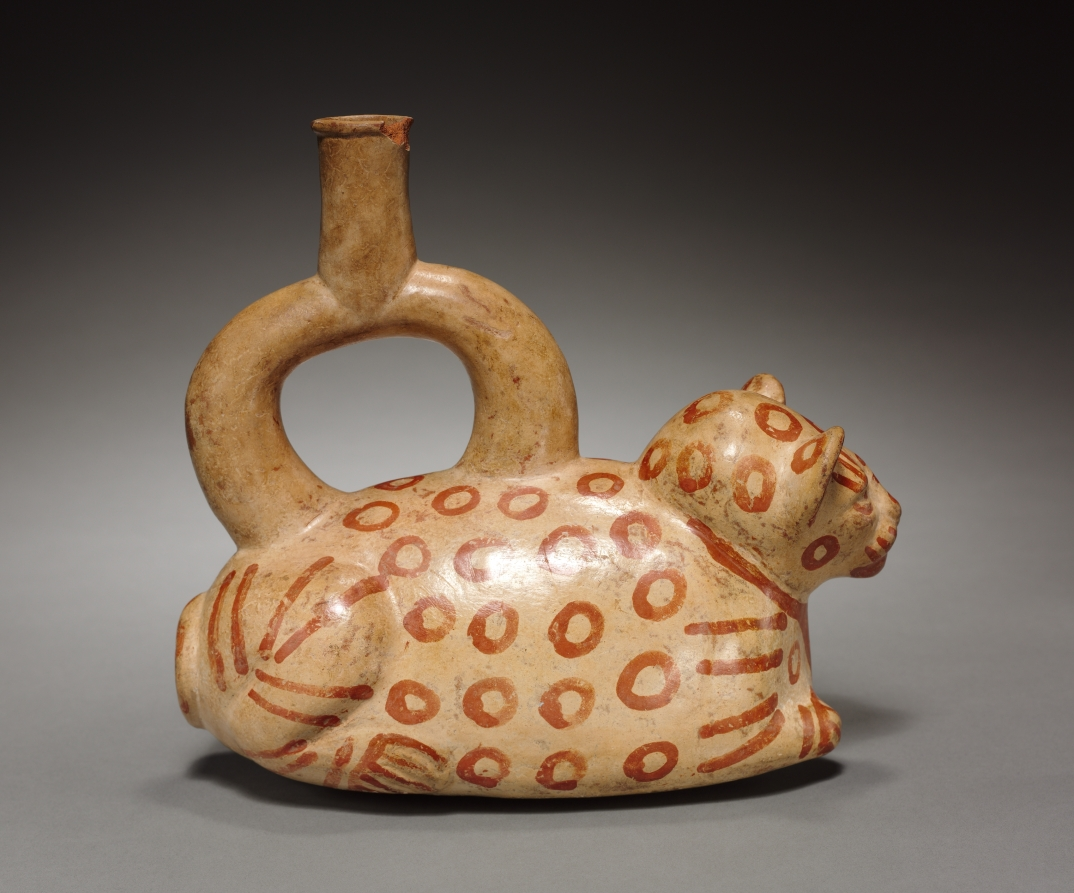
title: Stirrup Spouted Vessel of Feline Form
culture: Peru, Mochica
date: 1–1000 CE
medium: red earthenware decorated with cream-colored slip and brown pigment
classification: Ceramic